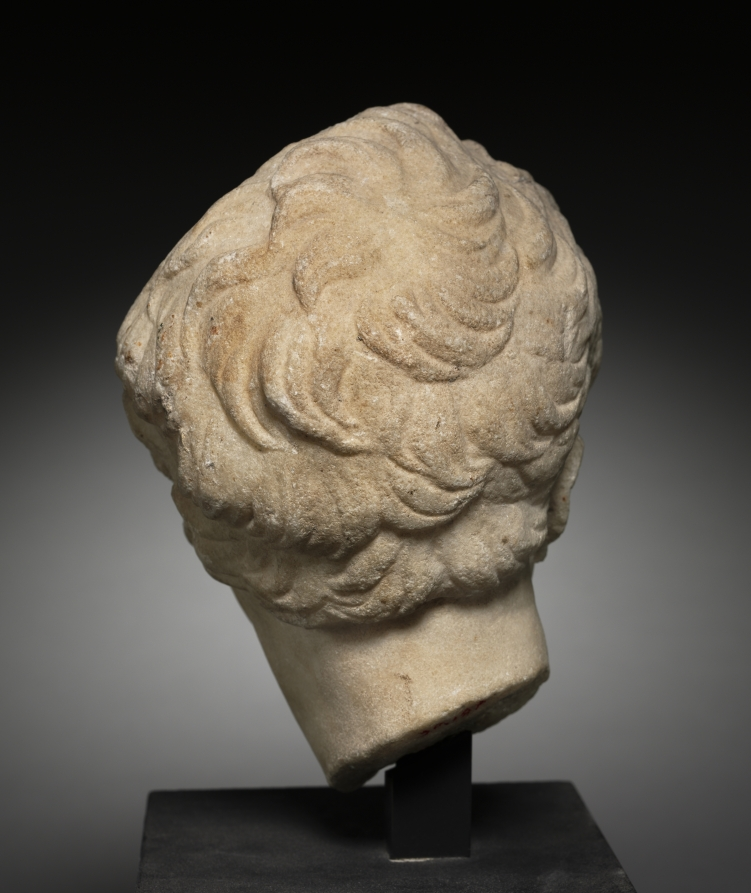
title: Eros, the God of Love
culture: Italy, Roman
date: 1–100 CE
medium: marble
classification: Sculpture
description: This is a Roman copy of the statue of Eros by Lysippus, the last of the great sculptors of Greece. He worked in the second half of the fourth century and was court sculptor to Alexander the Great. In the complete statue the god stood naked, his head turned to the right, his hand clasping a bow.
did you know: The oldest versions of Greek myth describe Eros, god of love and desire, as one of the first beings in existence.